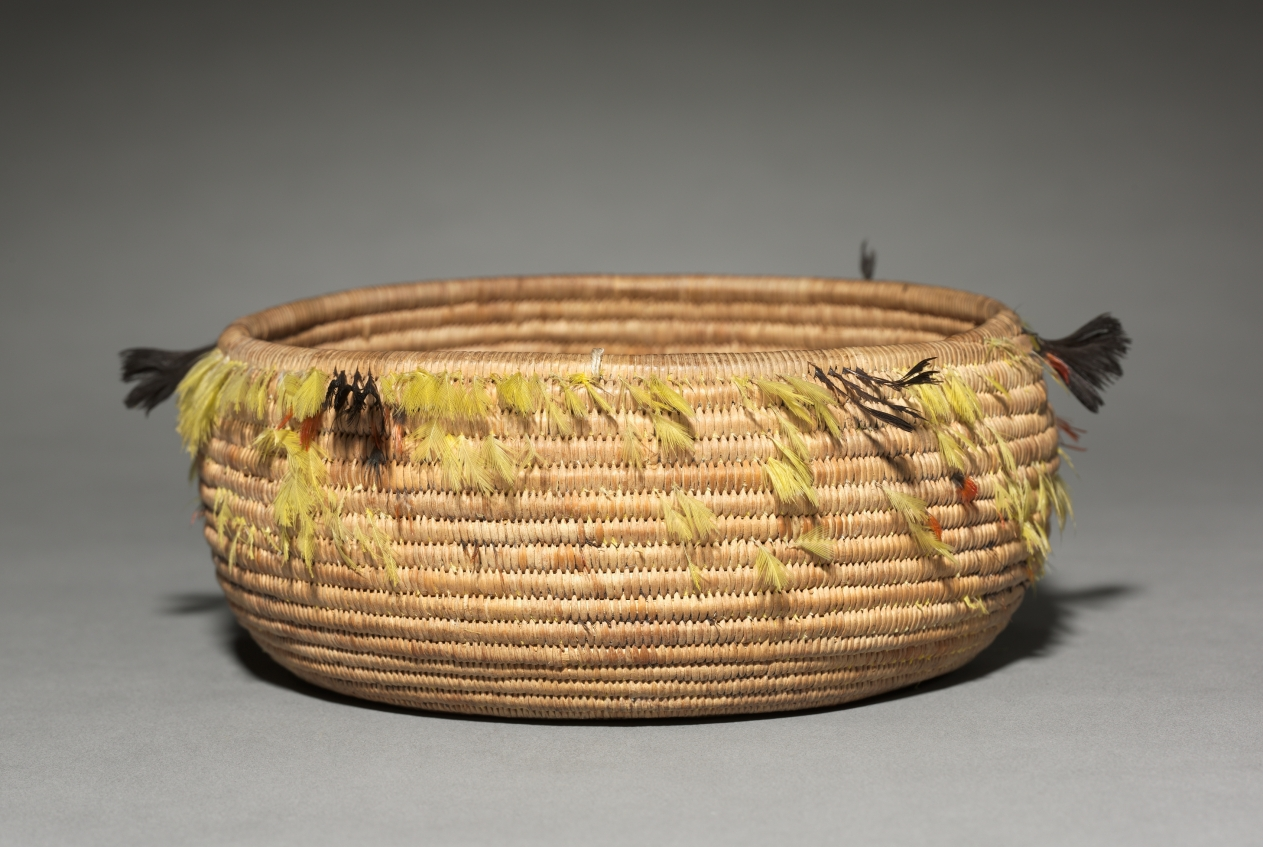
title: Gift Bowl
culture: California, Pomo, Eastern, early 20th century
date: c. 1900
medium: Sedge with Feathers; Coiled (3 rods)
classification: Basketry